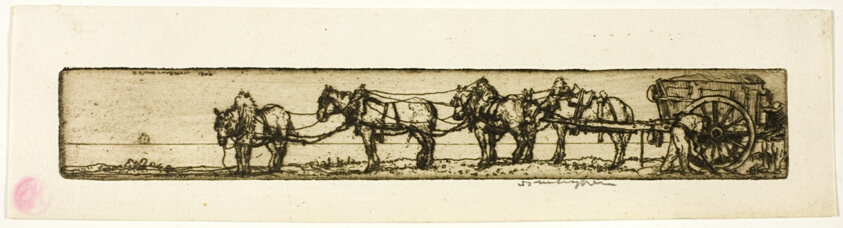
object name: Print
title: Draught Horses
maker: Donald Shaw MacLaughlan (American, born Canada, 1876-1938)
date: 1906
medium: Etching in black on cream laid paper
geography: United States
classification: etching; print; prints and drawing